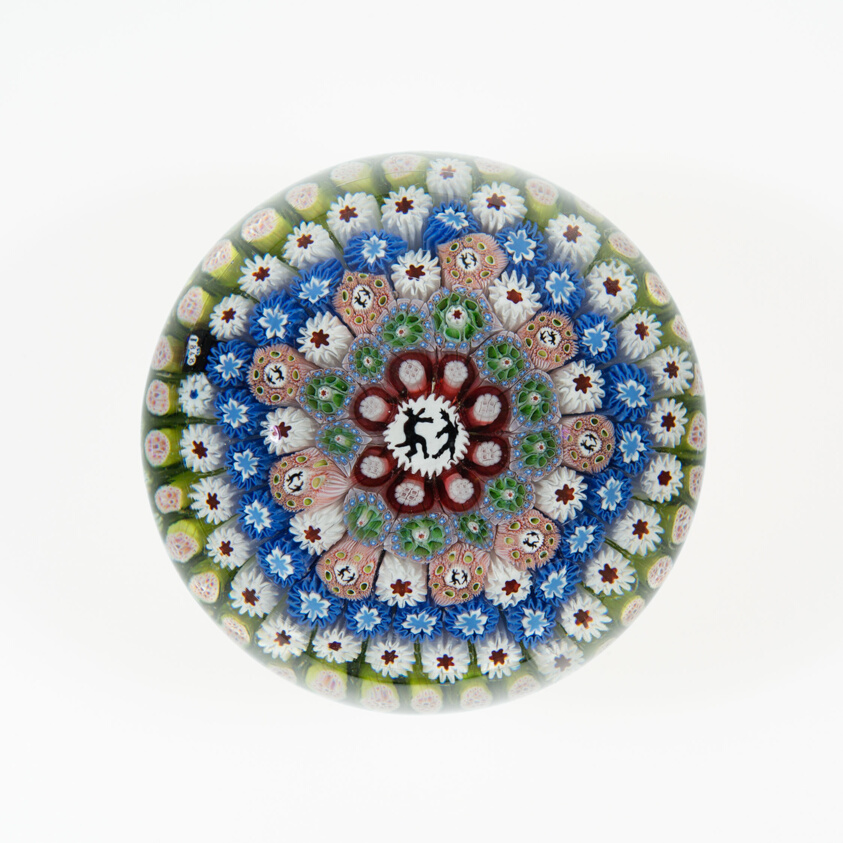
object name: Glass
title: Paperweight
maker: Saint-Louis Glassworks (Cristalleries de Saint-Louis); Lorraine, France, founded 1586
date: 1848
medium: Glass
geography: Saint-Louis-lès-Bitche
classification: paperweight; glass